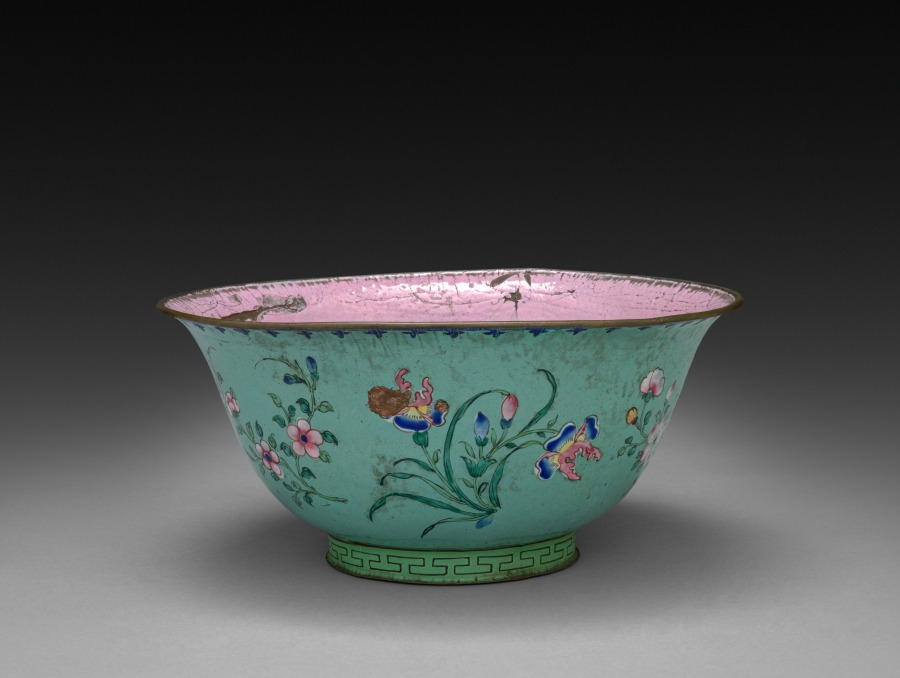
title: Bowl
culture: China, Qing dynasty (1644–1911)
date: 1800s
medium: enamel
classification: Enamel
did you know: The inside of the bowl is decorated with a pair of peaches, a symbol of immortality.